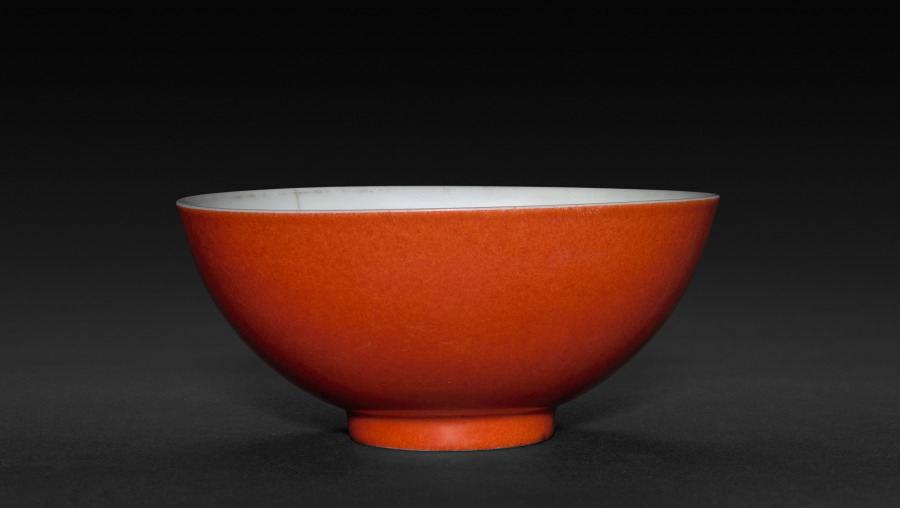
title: Wine Cup with Monochrome Red Glaze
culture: China, Jiangxi province, Jingdezhen kilns, Qing dynasty (1644-1911), Yongzheng mark and reign (1723-35)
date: 1723–35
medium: porcelain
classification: Ceramic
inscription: 大清雍正年制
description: In the Qing dynasty (1644–1911), luxury items became more affordable to larger parts of the society, including women, merchants, and literati in non-official positions. Imperial patronage and a growing urban population encouraged consumption of luxury goods and local craftmanship. This wine cup has a coral glaze on outside and a transparent glaze of white eggshell porcelain on the inside. It exemplifies Qing dynasty accomplishments in porcelain techniques and the creative mind of talented artisans who sought clients on a competitive market.